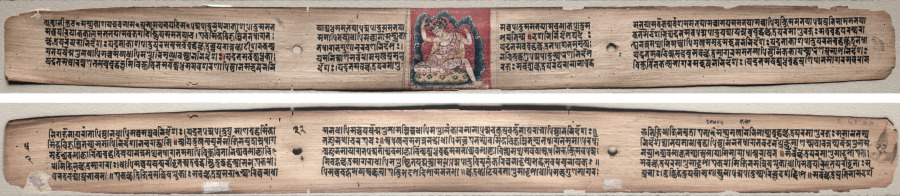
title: Folio 22 from a Gandavyuha-sutra (Scripture of the Supreme Array): Samantabhadra spinning clouds of things (recto); Text (verso)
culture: Nepal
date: 1000–1100s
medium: gum tempera and ink on palm leaf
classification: Painting